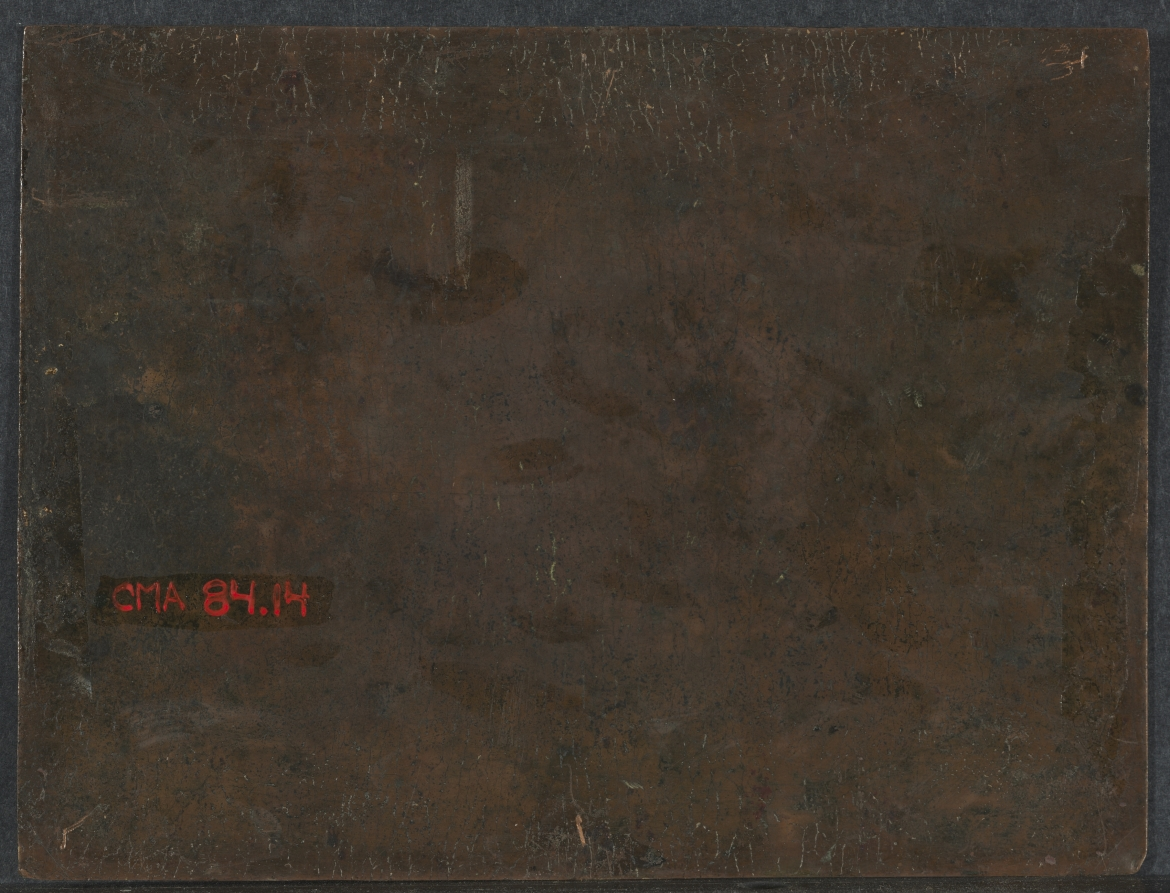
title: The Judgment of Paris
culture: Netherlands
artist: Joachim Anthoniz Wtewael (Dutch, 1566–1638)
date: 1602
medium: oil on copper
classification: Painting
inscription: signed lower left: IO. WTE / WAEL. FE / 1602 [TE, AE in monogram]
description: The Trojan prince Paris was asked to determine which goddess was the most beautiful. Hera (tothe left of the group) offered him political power, and Athena (seen from the back), military prowess, but Paris awarded the golden apple to Venus, the goddess of love, who promised him Helen, the most beautiful mortal in the world.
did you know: The artist dated and signed this work on a rock at the bottom right of the painting.